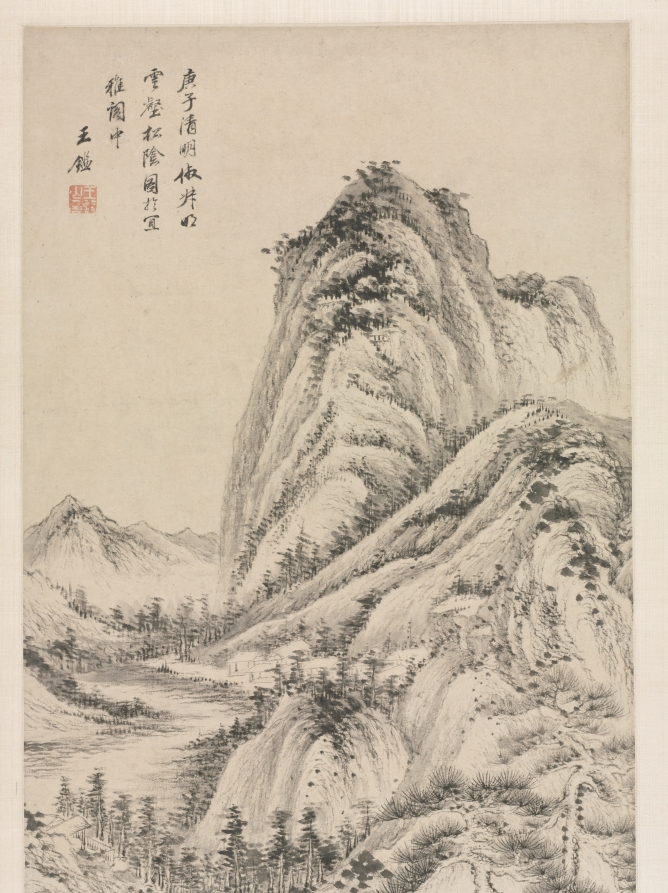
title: Shade of Pines in a Cloudy Valley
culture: China, Qing dynasty (1644-1911)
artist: Wang Jian (Chinese, 1598–1677)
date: 1660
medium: Hanging scroll; ink on paper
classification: Painting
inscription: Artist's inscription, signature, and seal: Painted at Yiyage in imitation of Wang Meng's Shade of Pines in a Cloudy Valley during the Qingming Festival of the gengzi year [1660]. Wang Jian [seal] Wang Jian zhi yin.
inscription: 2 additional seals: 1 of Bi Long 畢瀧 (18th c.); 1 unidentified.